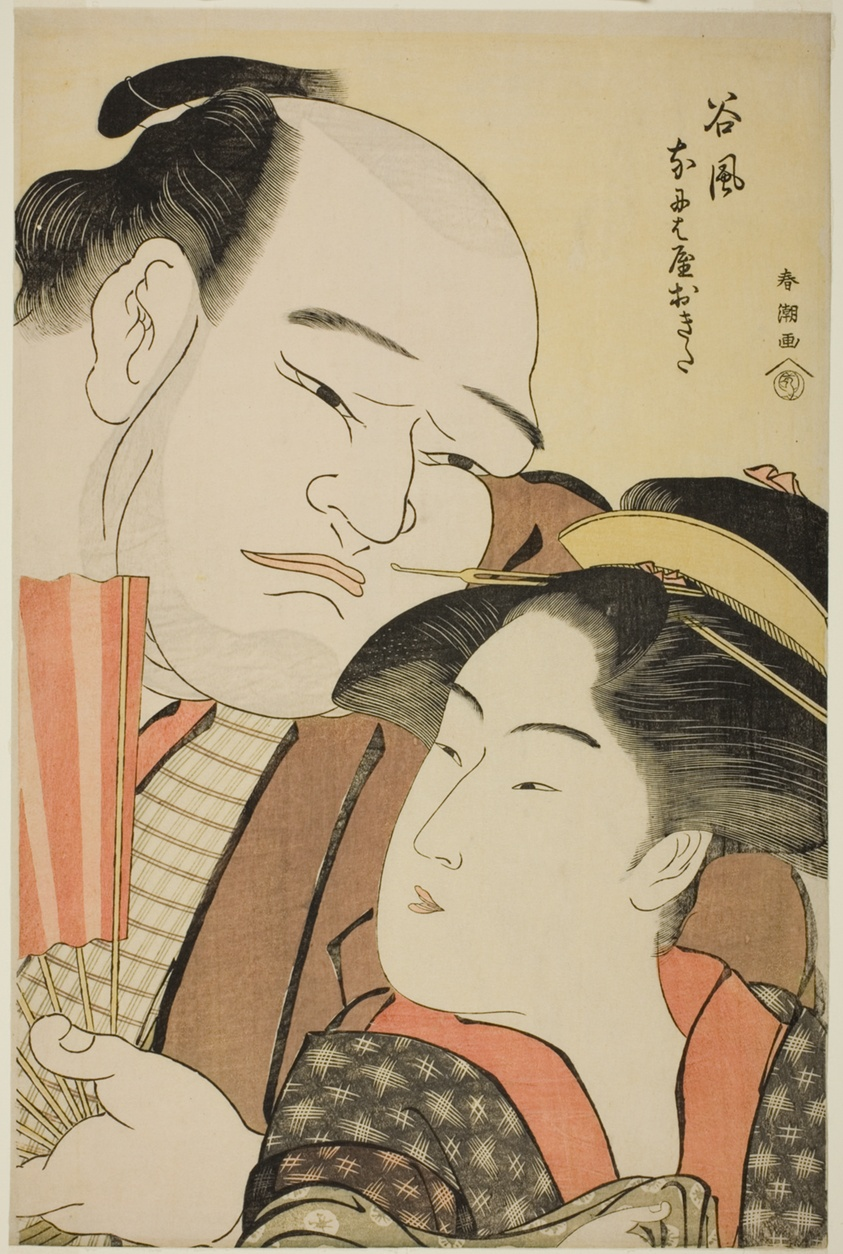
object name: Print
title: The Sumo Wrestler Tanikaze and the Waitress Okita of the Naniwaya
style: Japanese (culture or style)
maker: Katsukawa Shuncho; Japanese, active c. 1780-1801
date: c. 1794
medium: Color woodblock print; oban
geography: Japan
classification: woodblock print; print; asian art